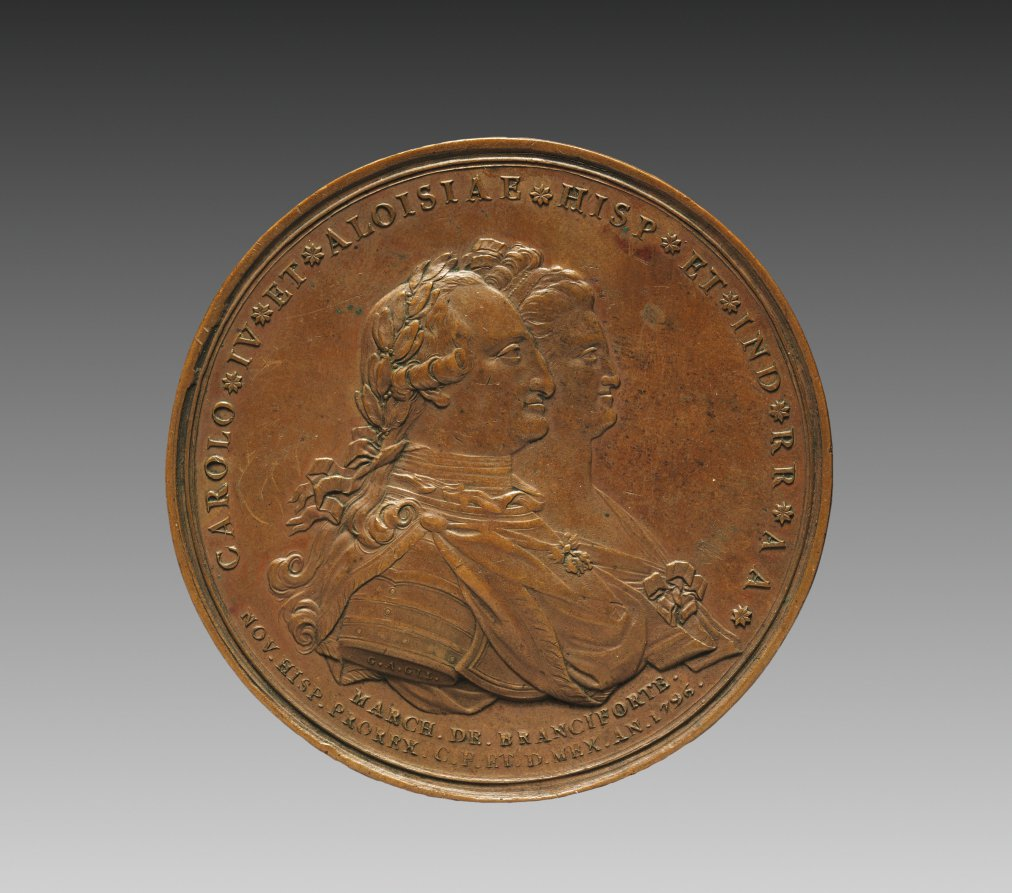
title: Portrait of Charles IV, King of Spain, and María Luisa, Queen Consort of Charles IV (obverse)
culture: Spain, late 18th century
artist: Manuel Tolsá (Spanish, 1757–1816)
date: 1796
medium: bronze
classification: Sculpture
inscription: "CAROLO IV ET ALOISIA HISP. ET. IND. A.A. MARCE DE FRANCIFORTE. NOV. HISP. PROREX. C.F. ET D. MEX. AN 1796."